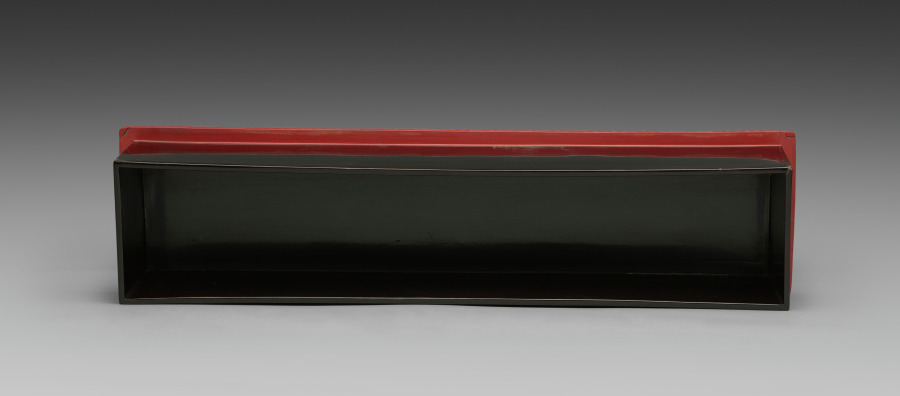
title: Base for a Carved Lacquer Scroll Box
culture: China, Qing dynasty (1644–1911), Qianlong reign (1736–95)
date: 1736–95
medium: cinnabar carved lacquer on wood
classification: Lacquer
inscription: 心寫治平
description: The elaborate design, superior craftsmanship, and inscription carved into the red cinnabar lacquer proclaim the imperial pedigree of this scroll box. On either end appears a five-clawed dragon, a design reserved only for an emperor. More dragons twist and wind through swirling clouds and waves along the length of the box’s sides and top. The carving is intricate and vigorous, while the design is controlled and regular. This box originally housed the handscroll, CMA 1969.31, private portraits of the Emperor Qianlong, his empress, and 11 other favorites among his presumed 40 or more wives during his 60-year reign.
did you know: This is the original box for the handscroll Portraits of the Qianlong Emperor and His Twelve Consorts, CMA 1969.31.